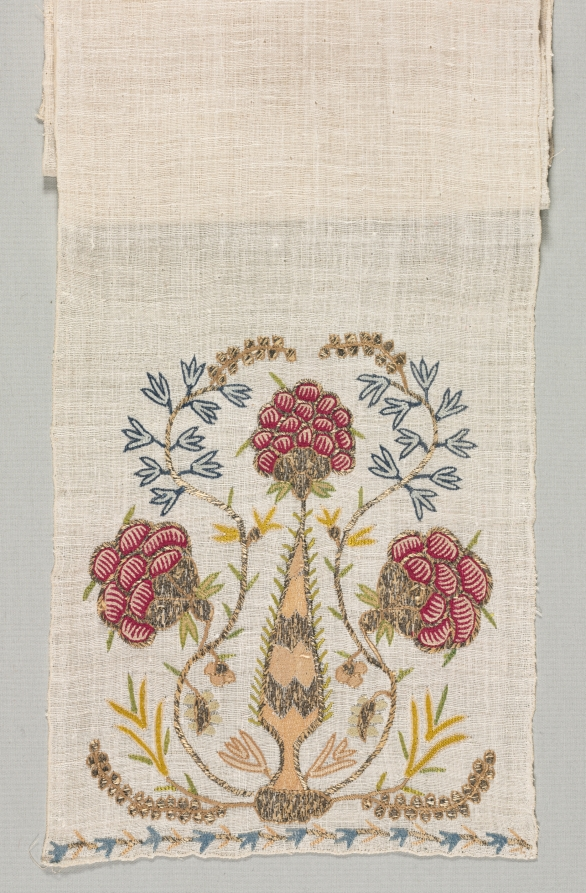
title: Embroidered Sash (Uckur)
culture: Turkey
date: 1700s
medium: embroidery: silk and silver filé on linen tabby ground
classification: Embroidery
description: Each end of the sash is embroidered with a single motif of large-scale flowering plants. Below the main motif is a stylized foliate device forming a narrow border.